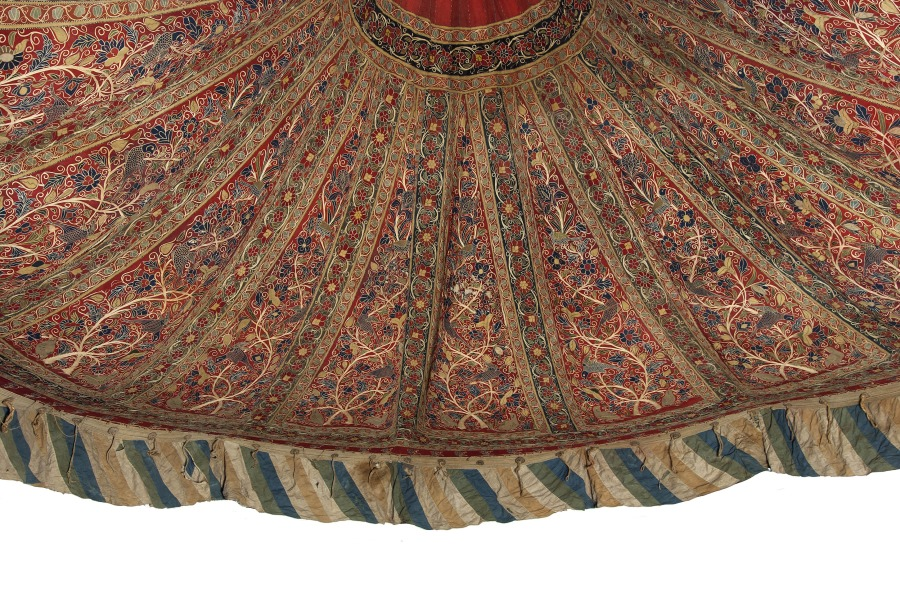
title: Royal Round Tent made for Muhammad Shah (Roof)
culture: Iran, Rasht, Qajar period (1779-1925)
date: 1834–48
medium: Interior: wool: plain weave, inlaid work; silk: embroidery, chain stitch; tape, leather; Exterior: cotton, wool: plain weave; rope, iron ring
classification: Textile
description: Royal tents were potent symbols of authority, wealth, and power throughout the greater Middle East. Rulers owned thousands of tents. They were used for shelter, shade, and innumerable functions in tent compounds that were essential for imperial ceremonies, travel, and military campaigns. Distinguished by size with elaborately decorated interior walls and ceilings, tents could be as large as castles. Opulent tents were also presented as imperial gifts. Tents are only known through documents before 1600. For example, in Baghdad in 809, Caliph Harun al-Rashid owned 4,000 ceremonial tents and 150,000 camping tents that were stored in the imperial Abbasid treasury. An astonishing variety and quantity of tents were housed in the royal Fatimid tent storeroom in Cairo in 1068-69, including "military tents, fortress tents, and castle tents, manufactured of . . . gold-brocaded stuff embroidered with designs of elephants, wild beasts, horses, peacocks, birds." Since 1600, Ottoman Turkish tents with elaborate floral decoration have been preserved in Istanbul in the Topkapi Palace Museum and Military Museum, and in European collections as war booty, primarily from the Ottoman Turks' attempt to conquer Vienna in 1683. These tents are not done in the Rasht technique, but rather are applique. In contrast, royal tents from Iran are extremely rare. This spectacular ceremonial tent is embroidered with the name of its owner, Muhammad Shah, who ruled Iran from 1834 to 1848 during the Qajar dynasty. The radiant jewellike interior features exuberant flora, blossoming vines, and robust birds made with colored wool embellished with silk-thread embroidery.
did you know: Rasht work is named after the city on the Caspian Sea in present-day Iran, which was a major silk trade center with numerous textile workshops.